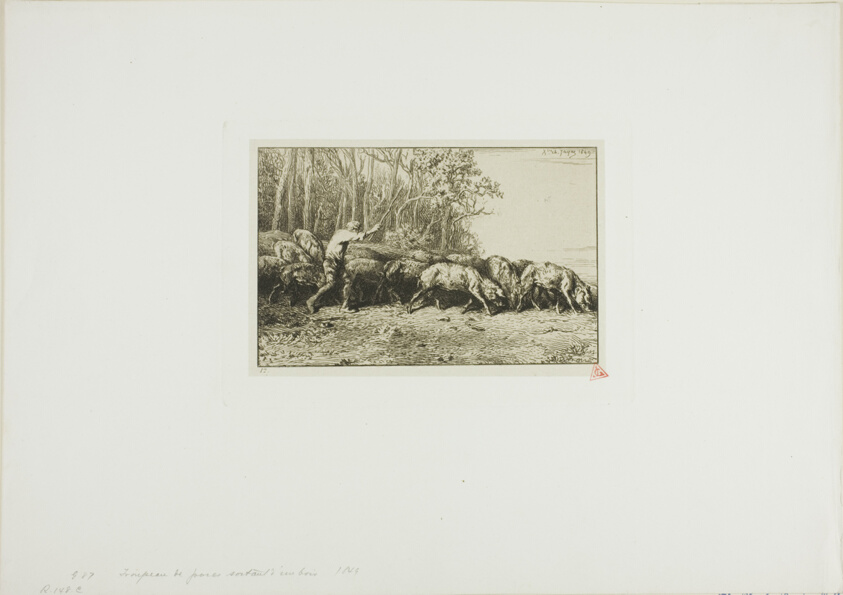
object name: Print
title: Herd of Swine Coming Out of a Wood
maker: Charles Émile Jacque (French, 1813-1894)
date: 1849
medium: Etching and drypoint on cream chine laid down on ivory wove paper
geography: France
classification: etching; print; prints and drawing